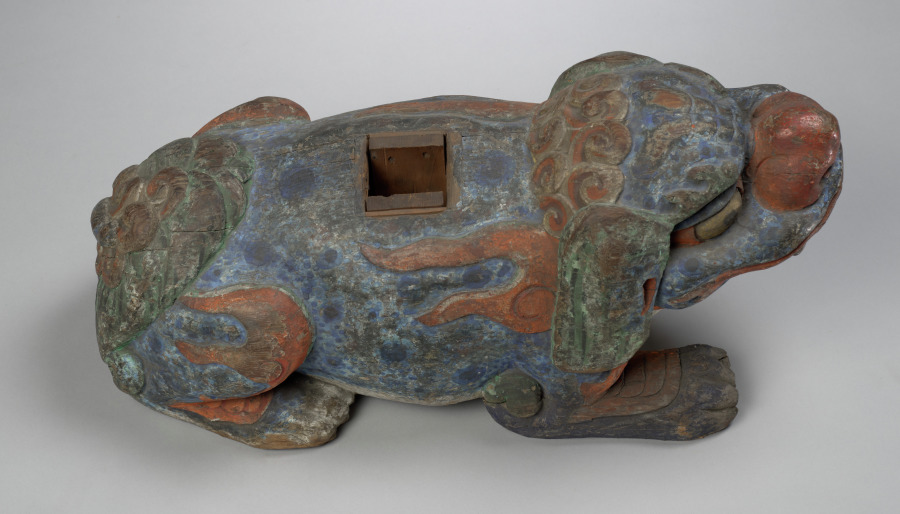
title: Base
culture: Korea, Joseon dynasty (1392–1910)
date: 1392–1897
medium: wood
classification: Arms and Armor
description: This wooden base for a musical instrument, possibly a set of bells or drums, was acquired in Korea in 1916 by Langdon Warner, who once served as the field agent for Asian art for the Cleveland Museum of Art. At the time of acquisition, it was mistaken as a part of a clothing stand related to a set of military uniform (1918.560.1) probably because the wooden base and a set of military uniform were purchased at the same antique shop.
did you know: It was a base of a musical instrument, such as a set of bells or drums.